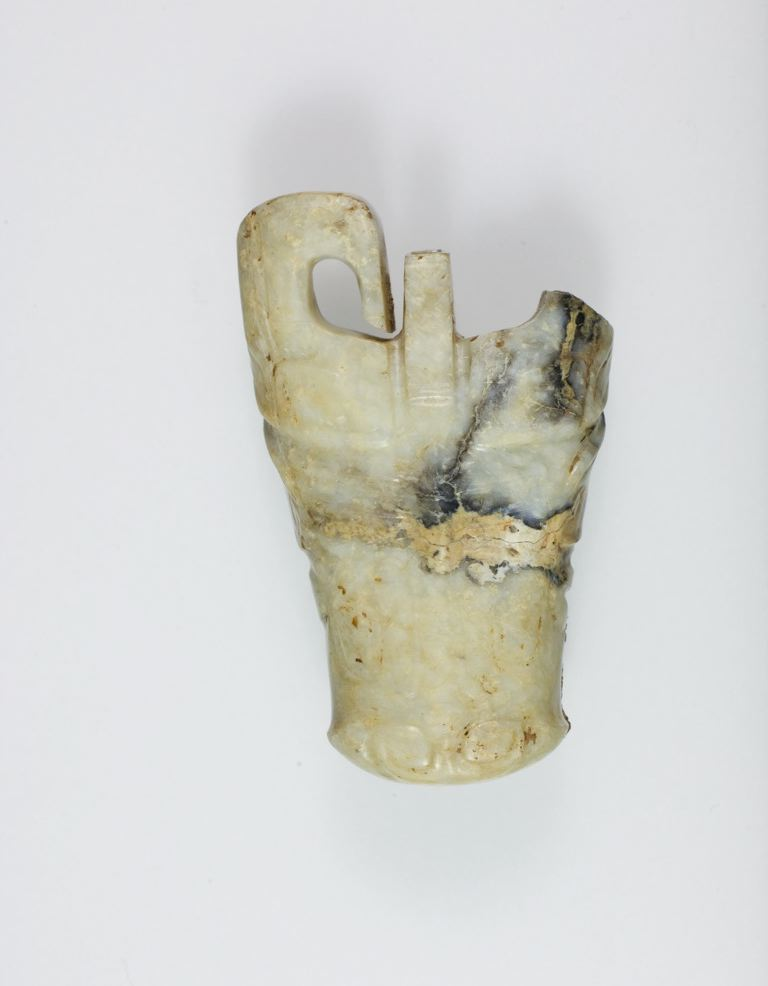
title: Pendant, buffalo head.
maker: China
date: Shang dynasty (c.1600–1046 BCE)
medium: Jade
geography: China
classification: jade; asian art